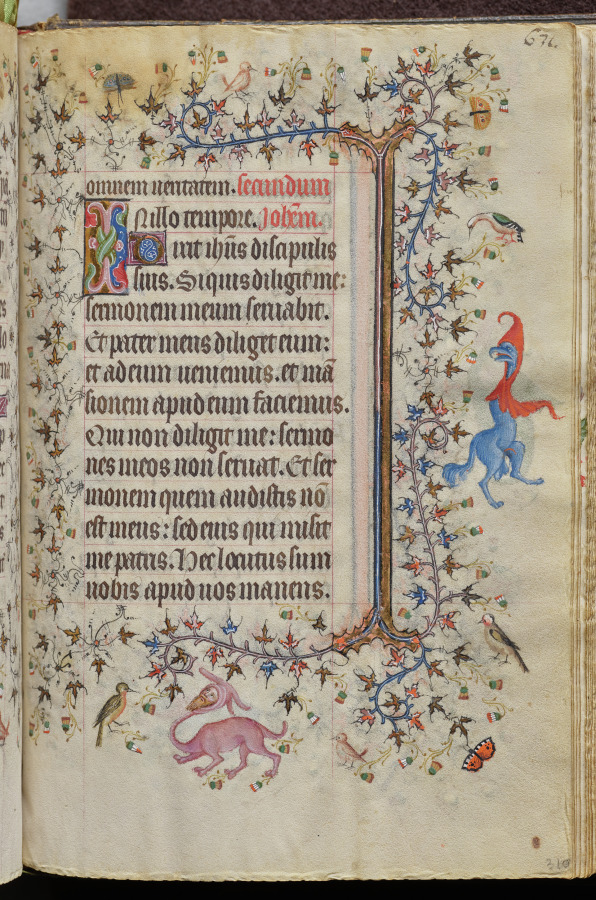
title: Hours of Charles the Noble, King of Navarre (1361-1425), fol. 310rv, Text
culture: France, Paris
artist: Master of the Brussels Initials and Associates (French)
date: c. 1405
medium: ink, tempera, and gold on vellum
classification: Bound Volume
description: This precious volume was obviously highly prized by its owner, the French-born King of Navarre, who had his coat of arms painted on no less than twenty folios. Rather than directly commissioning this manuscript from a specific workshop, it seems that Charles the Noble acquired his book of hours -- perhaps ready-made for the luxury market -- while on a trip to Paris in 1404-05. A collaborative effort, six painting styles are evidenced within the pages of this codex, those of two Italians, two Frenchmen, and two Netherlanders. The painter who was responsible for the planning and decoration of the book, and who produced seventeen of the large miniatures, was a Bolognese artist known as the Master of the Brussels Initials. His principal assistant, responsible for most of the borders, was a Florentine who signed his name "Zecho" da Firenze on folio 208 verso.